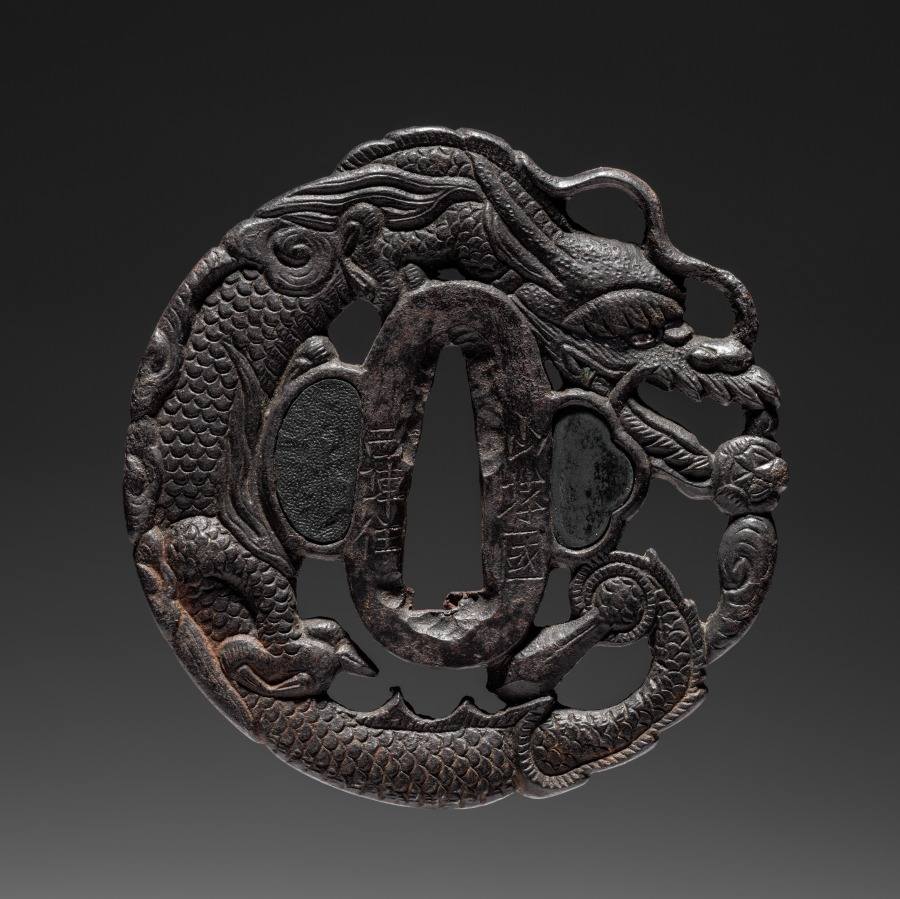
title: Sword Guard (Tsuba) with Dragon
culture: Japan, possibly Edo period (1615-1868)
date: c. 1615–1868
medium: iron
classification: Arms and Armor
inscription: signed: 山城國西陣住埋忠